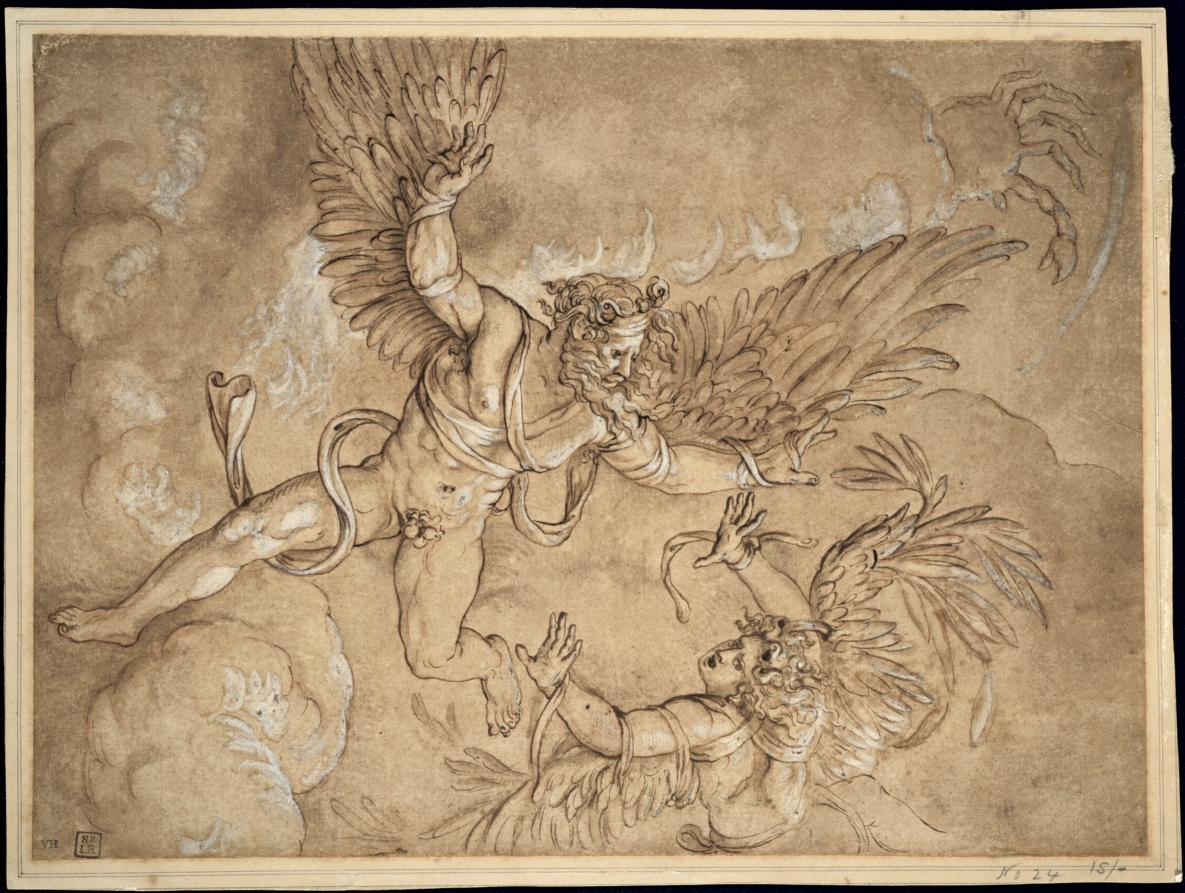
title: Copy after Giulio Romano's Fall of Icarus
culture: Italy, 16th century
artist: after Giulio Romano (Italian, 1492/99–1546)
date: after 1536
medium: pen and brown ink and brush and brown wash over red chalk, heightened with lead white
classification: Drawing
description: Having flown too close to the sun, Icarus plummets from the sky as the wax securing his makeshift wings melts, and the straps unravel. His father Daedelus, who invented the wings, watches in horror as his son begins a deadly fall. Punished for failing to heed his father’s warning and attempting to enter the realm of the gods, Icarus was a moral reminder to Renaissance viewers of human fallibility and the risks of excessive pride.